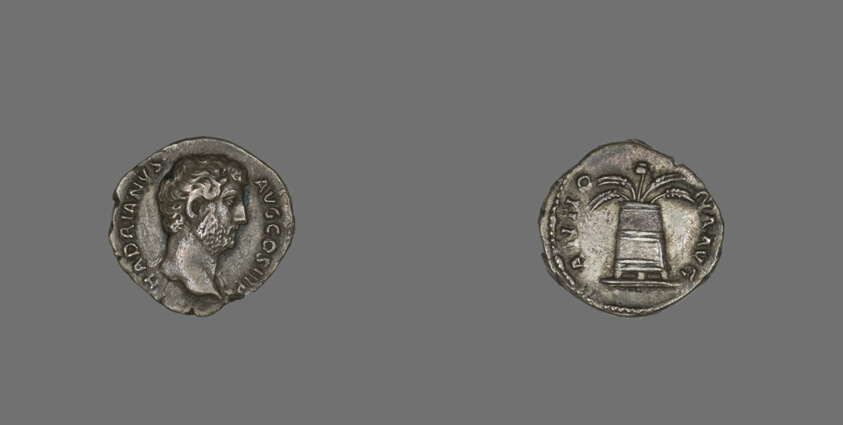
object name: Coin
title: Denarius (Coin) Portraying Emperor Hadrian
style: imperial (roman), ancient, roman (ancient, style or period)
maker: Roman, minted in Rome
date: 134-138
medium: Silver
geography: Roman Empire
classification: coin; ancient art; struck